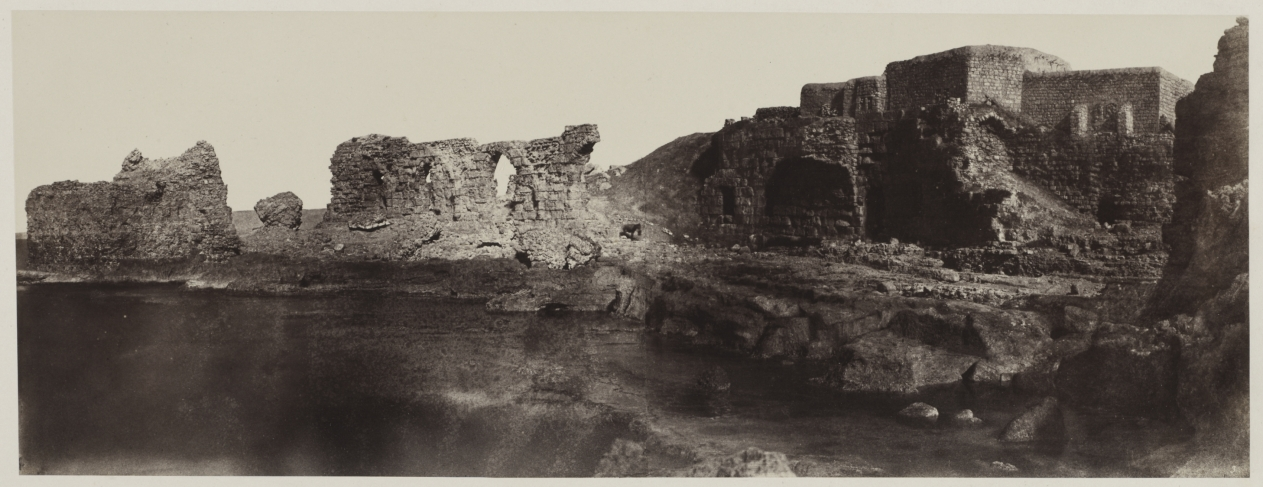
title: Kaalat el Athlit, Syria, View from the Seaside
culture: France, 19th century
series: Voyage en Orient, vol 2, "Chateau du temps des Croisades en Syrie"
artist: Louis de Clercq (French, 1836–1901)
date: 1859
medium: albumen print from calotype negatives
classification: Photograph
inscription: Written in negative: "3"; printed in black ink on mount: "KALAAT EL ATHLIT / CÔTÉ DE LA MER/[artist's seal]"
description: After fulfilling his obligation to a government-sponsored expedition to the crusader castles of Syria and Asia Minor, Louis de Clercq continued his photographic exploration of the Holy Land, moved on to Egypt, and returned to France through Spain. From the probably several hundred paper negatives he took during his extensive travels, de Clercq published a selection of 222 albumen prints, divided into 6 volumes, which were frequently bound as 5 albums, titled Voyage in Orient (1859–60). This carefully posed panorama of the Syrian coastline at Kaalat el Athlit, bathed in warm light and luminous shadows, records the sweep of space and rugged beauty of the site, emphasizing its geographical and topographical features. Interestingly, de Clercq’s use of the panoramas represents an impressive technical achievement, since the difficulties in mid-19th-century photography only increased when the negatives had to form a continuous image. His panoramas also reveal the period’s zeal to convey as much information as possible about the experience of a place.